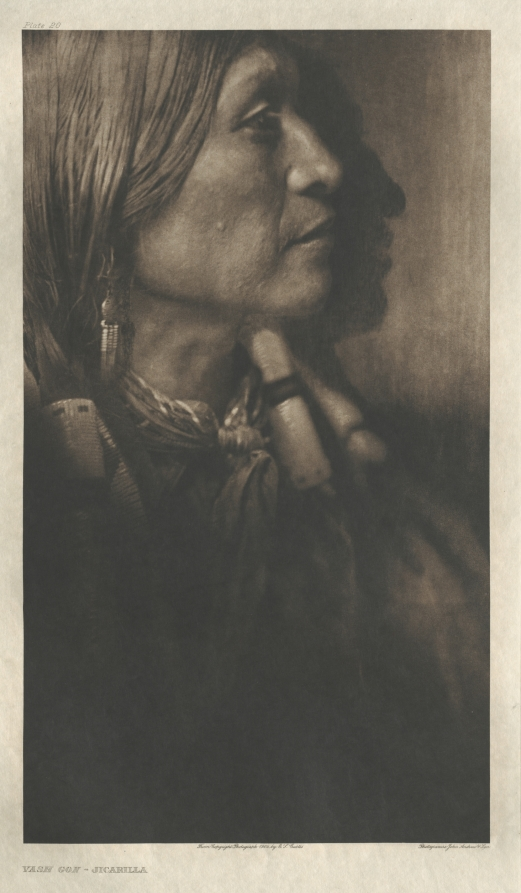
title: Portfolio I, Plate 20: Vash Gon-Jicarilla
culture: America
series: The North American Indian: being a series of Portfolios picturing and describing the Indians of the United States, the Dominion of Canada, and Alaska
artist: Edward S. Curtis (American, 1868–1952)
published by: The University Press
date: 1903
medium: photogravure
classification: Portfolio